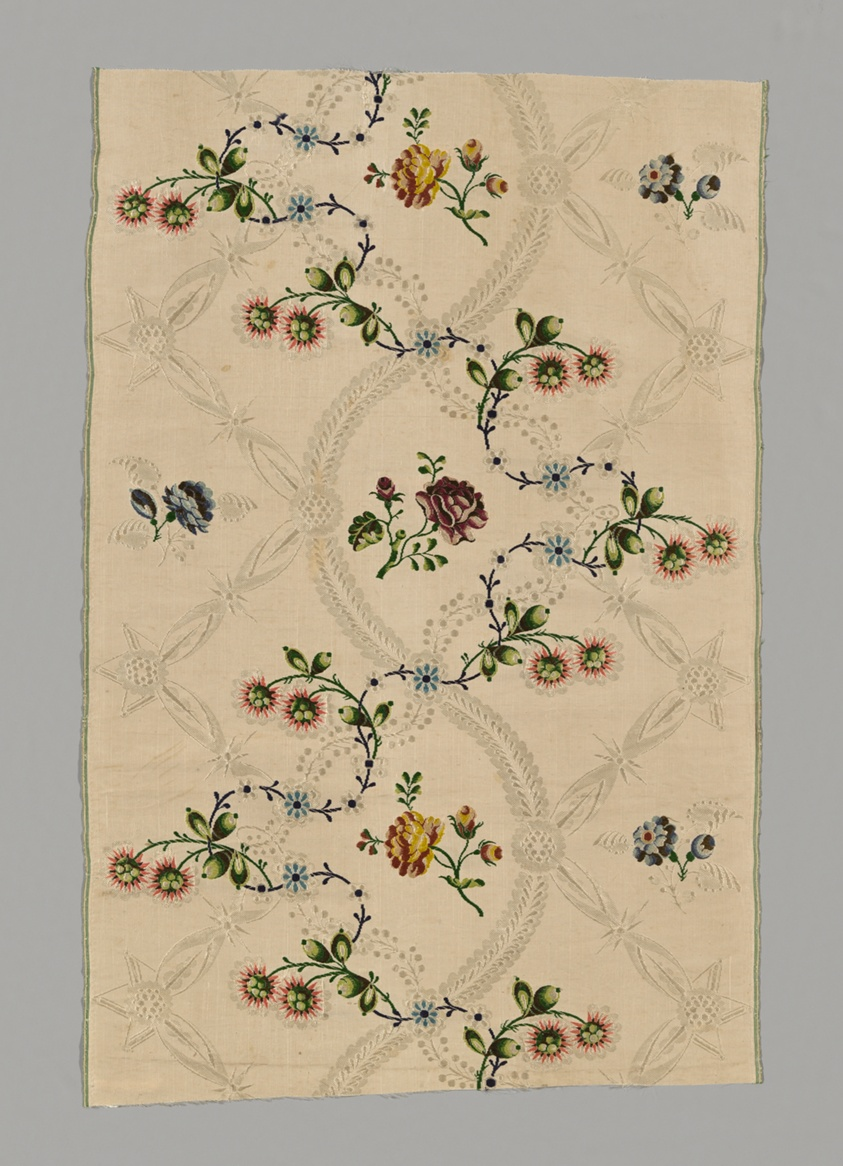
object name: Textile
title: Panel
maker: Possibly after a design by Anna Marie Garthwaite (English, 1690–1763); England, Spitalfields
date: c. 1745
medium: Silk, plain weave with supplementary patterning and brocading wefts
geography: Spitalfields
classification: textile; weaving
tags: flowers, foliage